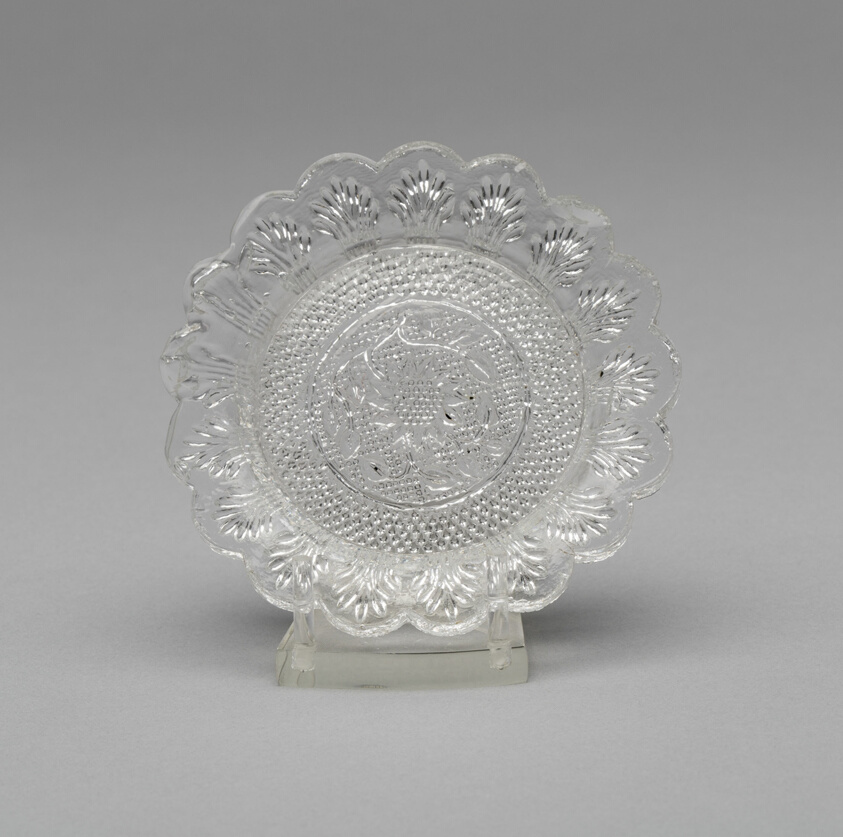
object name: Glass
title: Cup plate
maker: Artist unknown (American, 19th century); New England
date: 1826–27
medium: Pressed glass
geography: New England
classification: plate (general, dish); glass; american decorative arts; american arts; decorative arts